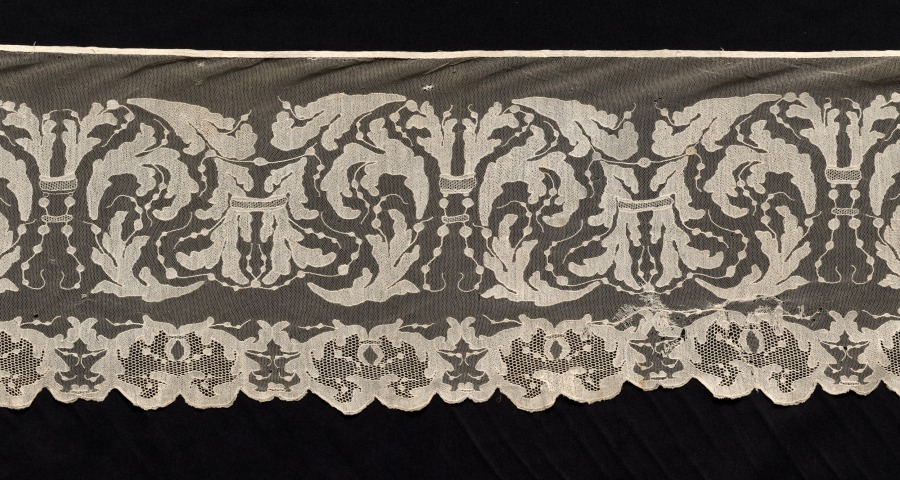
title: Border with Floral Motifs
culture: Italy, Sardinia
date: 1800s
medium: Bleached linen (est.): needle lace, filet/lacis (knotted ground and darned in one direction)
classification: Lace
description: A tendril motif is a recurring pattern in needle lace. The frequent use of the motif, adapted in lace from different centuries and regions, suggests that it was found in a pattern book. Here, the pattern is unusually ornate with additional swirling and flowering motifs.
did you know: This lace was given to the museum by Louise Tifft Brown, a native Clevelander who became an expert in lace while living in Venice for 35 years.